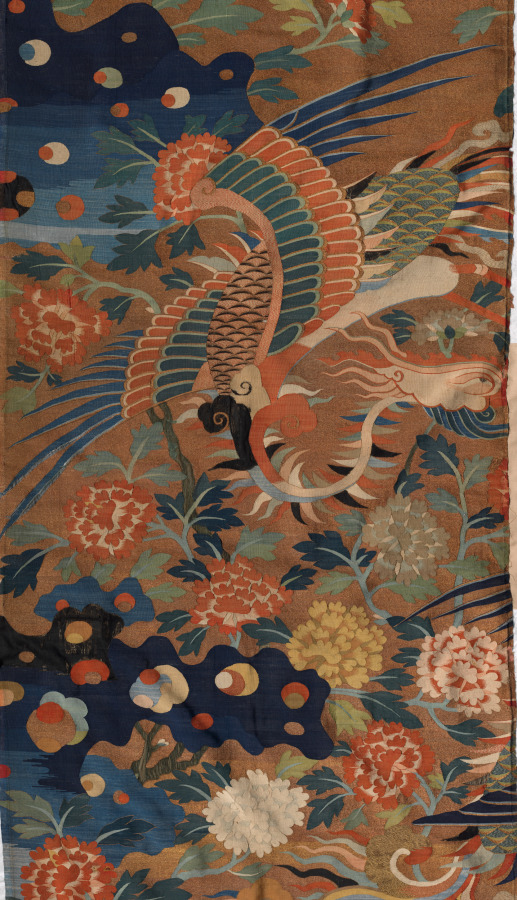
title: Tapestry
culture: China, Ming Period (1368-1644)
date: 1368–1644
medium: tapestry weave, silk and gold thread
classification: Tapestry